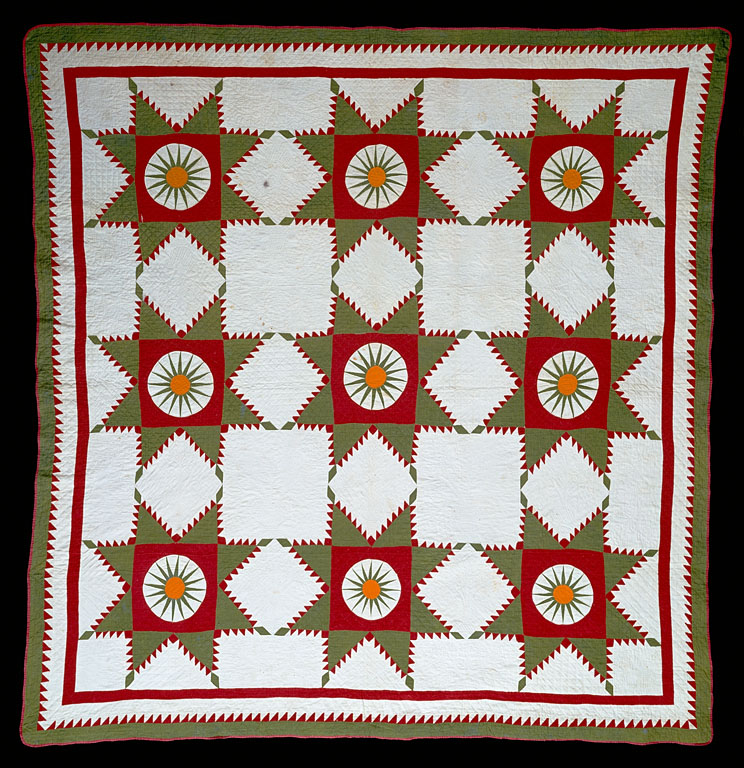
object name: Textile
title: Bedcover (Sunburst or Feathered Edged Star Quilt)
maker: United States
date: c. 1830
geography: United States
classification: textile; needlework - quilt